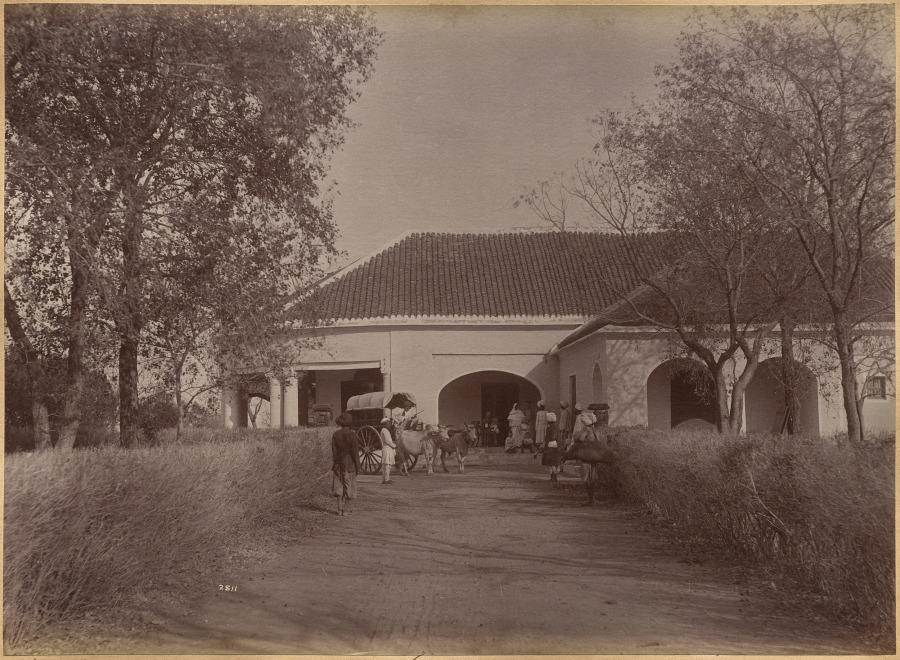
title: Mr. William's House, Jhansi (verso)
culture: India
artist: Raja Deen Dayal (Indian, 1844–1905)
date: c. 1882–87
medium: albumen print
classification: Photograph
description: These photographs are part of an album, now disassembled, of around 105 photographs taken in India between 1885 and summer 1887 that provide glimpses into the lives of the British colonial elite and royal and upper-class Indians. The museum holds another group of 37 pictures from this album (2016.266), which was probably commissioned by a British civil servant visiting or working in India around 1888 as a personal souvenir of his experiences there.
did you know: Raja Deen Dayal is regarded now, and was considered during his lifetime, to be India’s most important 19th-century photographer.